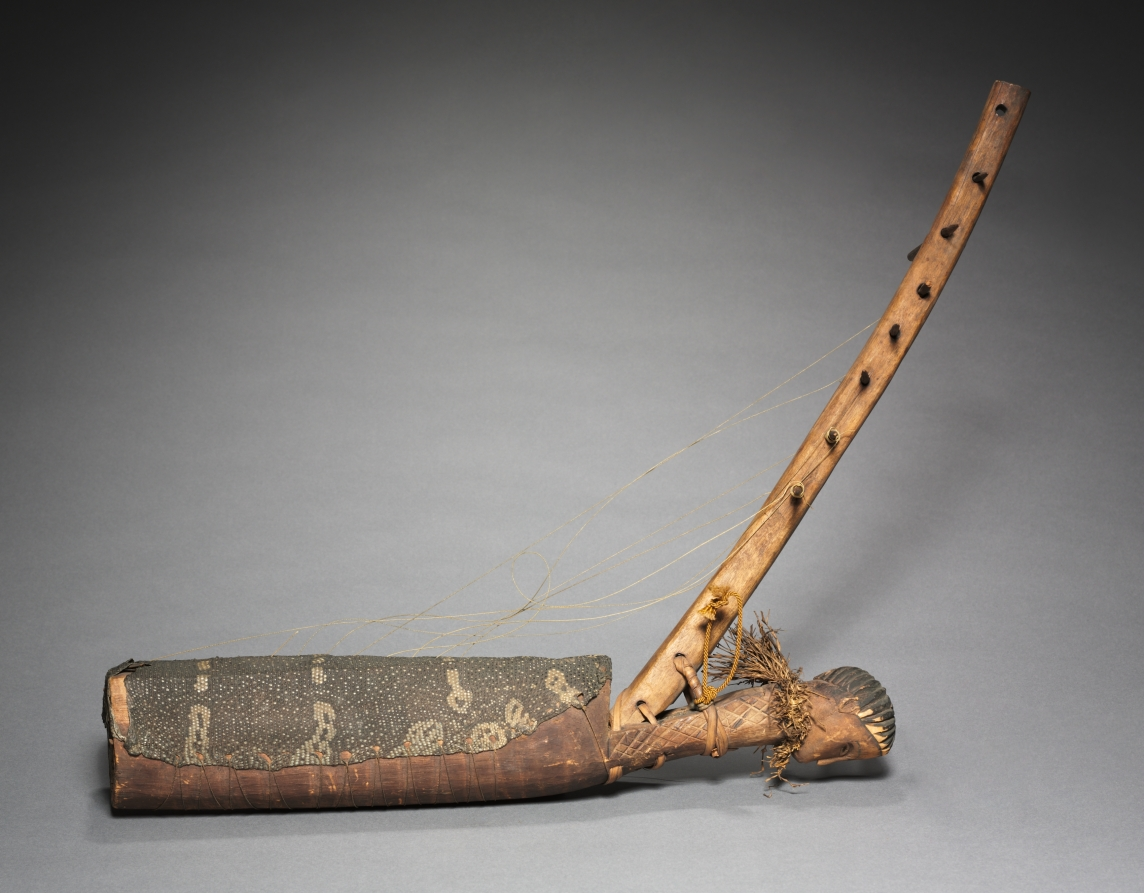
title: Harp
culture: Africa, Central Africa, Democratic Republic of Congo, unknown maker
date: 1900s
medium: Wood, snakeskin, plant fiber, cane, string, and colorant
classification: Musical Instrument